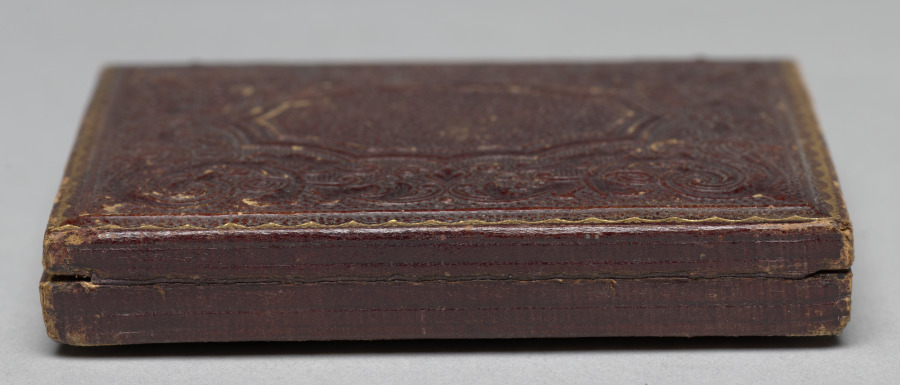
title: Urban Worker Smoking Tyrolean Pipe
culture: America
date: c. 1855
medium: ambrotype, sixth plate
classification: Photograph